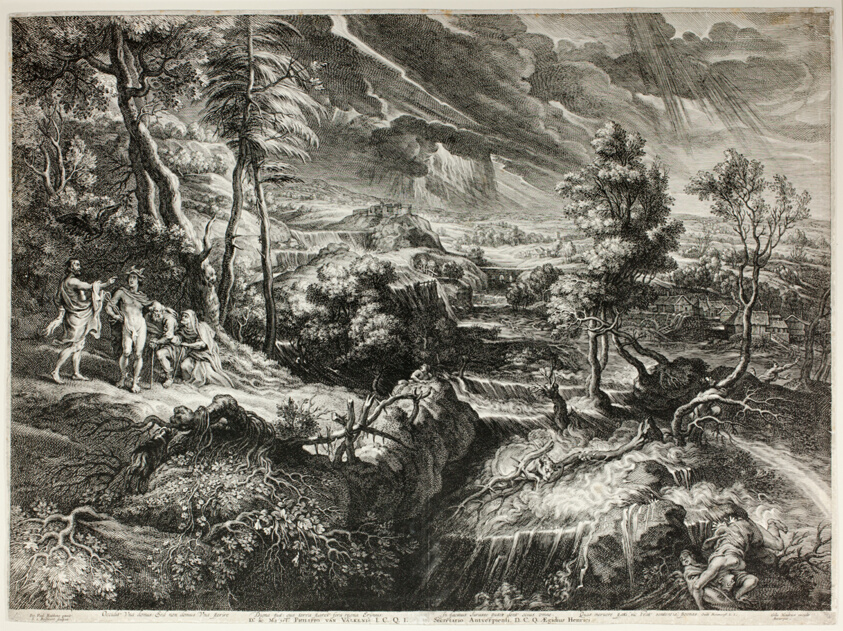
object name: Print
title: Landscape with Philemon and Baucis, from Large Landscapes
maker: Schelte Adamsz. Bolswert (Dutch, active in Flanders, c. 1586–1659); after Peter Paul Rubens (Flemish, 1577-1640); published by Gillis Hendricx (Flemish, active c. 1642-1677)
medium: Engraving in black on cream laid paper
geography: Netherlands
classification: engraving; paper; print; prints and drawing